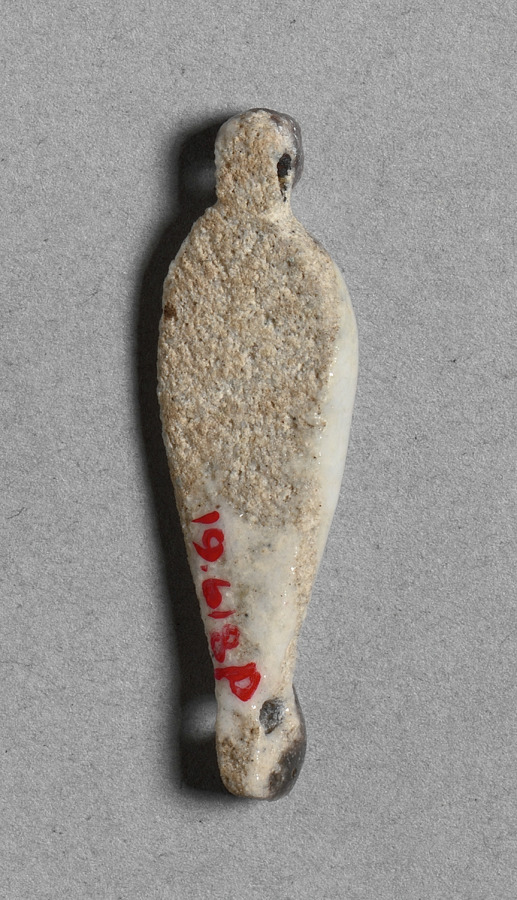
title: Petal-Shaped Bead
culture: Egypt, New Kingdom (1540–1069 BCE), Dynasty 18, reign of Amenhotep III (1390–1352 BCE)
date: c. 1391–1353 BCE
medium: faience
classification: Jewelry